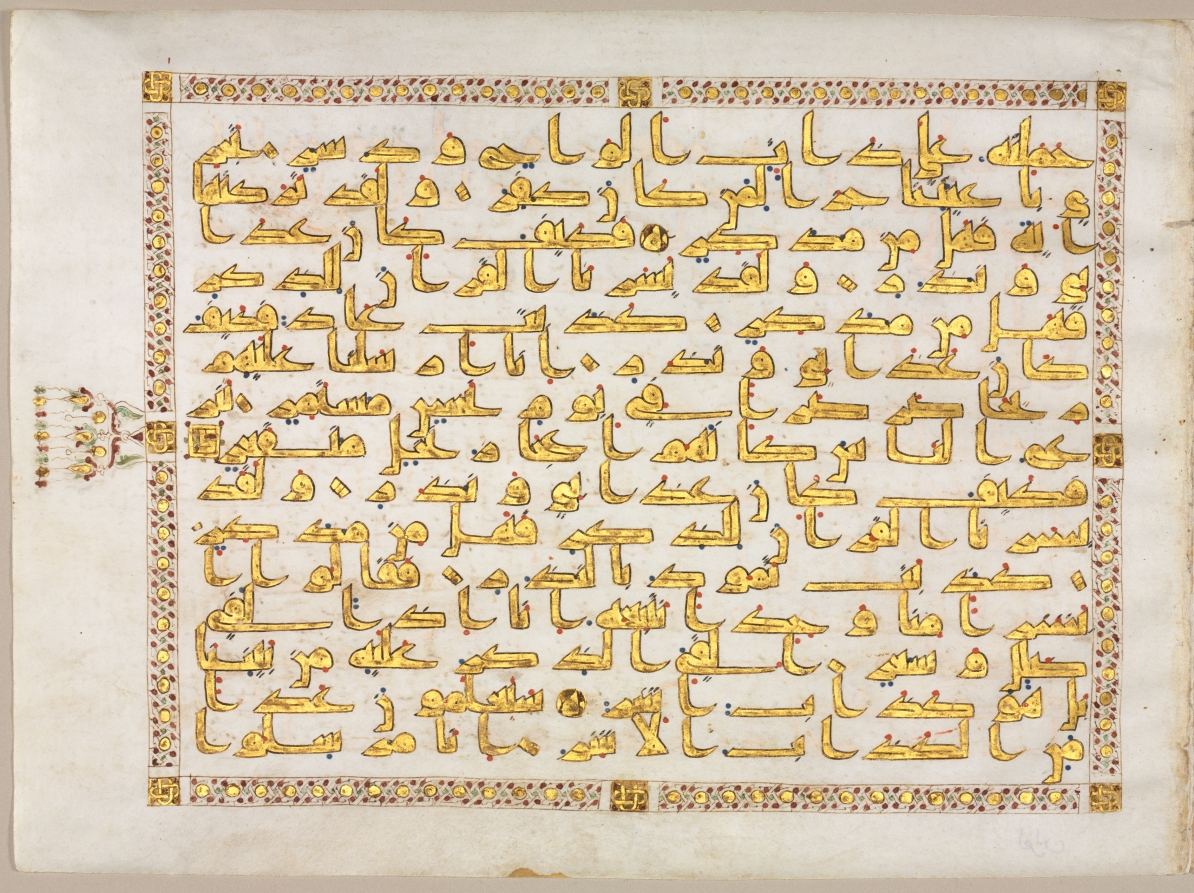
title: Qur'an Manuscript Folio (recto); left side of bifolio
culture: North Africa, Aghlabid or Abbasid Period, 9th century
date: 800s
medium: gold, ink and colors on parchment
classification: Manuscript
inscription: Sura al-Qamar (54: 13-part 27). Script: Kufic (fifteen lines to a page)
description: Calligraphy, the art of beautiful writing, was elevated above all other art forms in the Islamic world because Allah, God, revealed the divine word of Islam to the Prophet Muhammad in the Arabic language. Arabic script evolved gradually until the 800s when Muslim scribes produced copies of the Qur'an that were calligraphic masterpieces. This Qur'an, written entirely in gold, exemplifies the angular form of writing known as kufic at its majestic best. Distinctive markings—short ink strokes, colored dots—identify the vocalization of the text. The folio is framed by an interlacing border and displays a leafy motif in the outer margin.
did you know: The text is from the Chapter of the Moon (54:13–27).